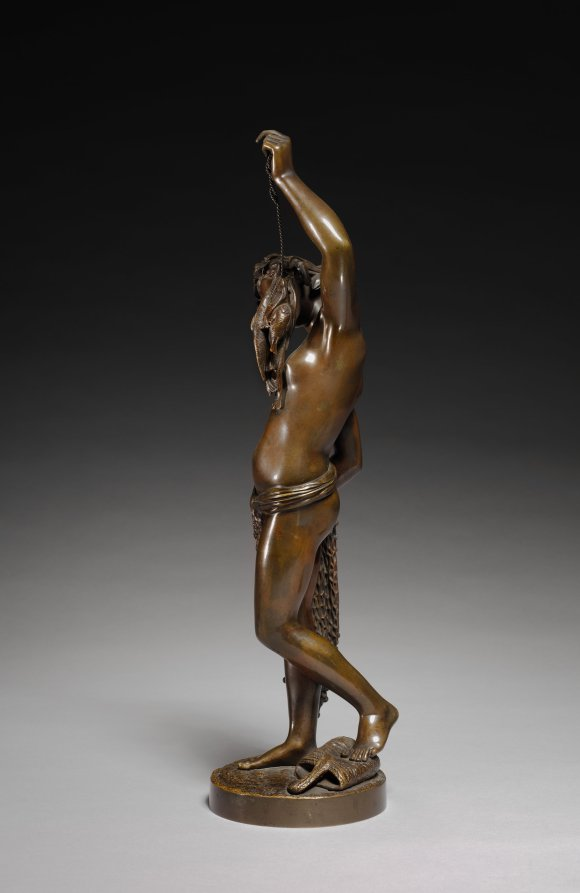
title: Allegory of Fishing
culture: France, 19th century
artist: James Pradier (Swiss, 1790–1852)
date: c. 1840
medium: bronze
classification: Sculpture